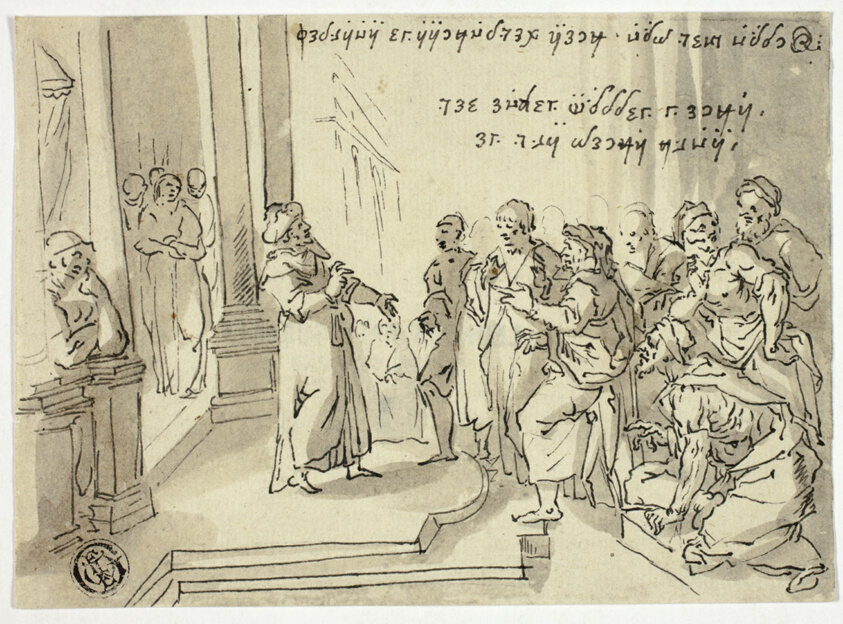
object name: Drawing and Watercolor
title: Ecce Homo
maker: Unknown Artist; Flemish, 17th century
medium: Pen and black ink, with brush and brown wash, on ivory laid paper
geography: Flanders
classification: pen and ink drawings; drawings (visual works); prints and drawing